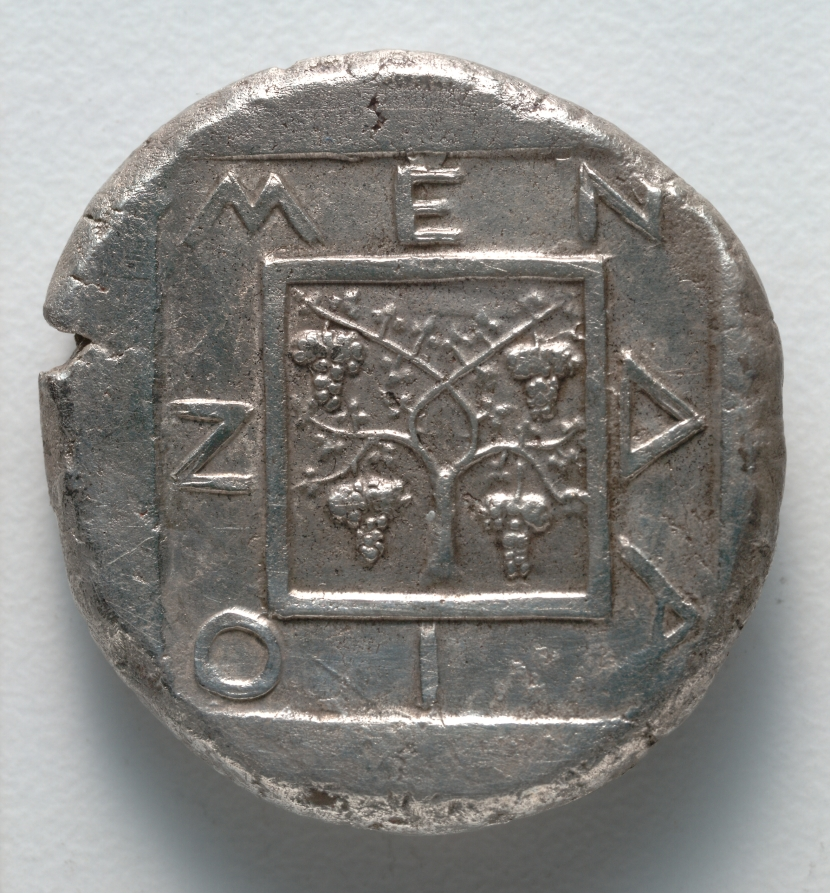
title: Tetradrachm: Grapevine within Square and Incuse Square (reverse)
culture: Greek, minted at Mende (Chalkidiki)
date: c. 430 BCE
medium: silver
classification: Coins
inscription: ΜΕΝΔΑΙΟΝ